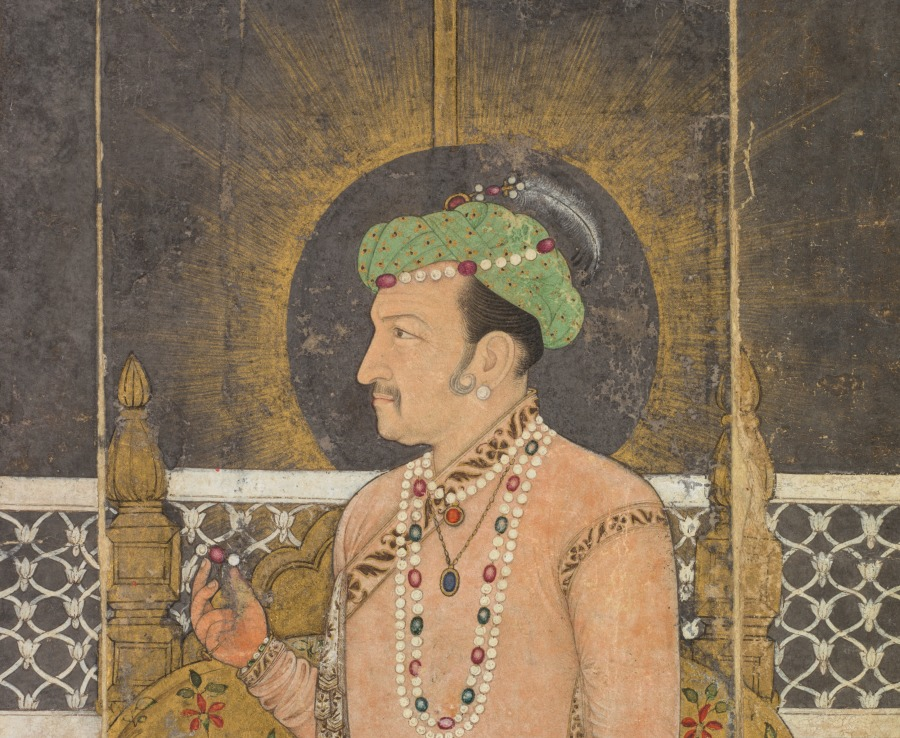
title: Posthumous portrait of Emperor Jahangir under a canopy (recto)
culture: India, Mughal, 17th century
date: c. 1650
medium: Gum tempera, ink, and gold on paper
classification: Painting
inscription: recto: inscription of identification in upper border, partially erased inscription at lower edge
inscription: Persian inscription above, in inner border, in nasta‘liq script: Great King Jahangir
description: Jahangir, the fourth Mughal emperor, was remembered for his greatness long after his death. Ruling from 1605 to 1627, he laid the foundations for long-term trade and diplomatic relations with various nations of Europe, most notably England and Portugal. He oversaw the transition of Mughal India into a global power during a time that can be considered the international Age of Exploration. This posthumous portrait depicts Jahangir amid the trappings of wealth and power with the light of divine sanction shining behind his head. A white marble railing demarcates his imperial space.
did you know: Jahangir holds a ruby or spinel, thought to be a talisman for military victory.